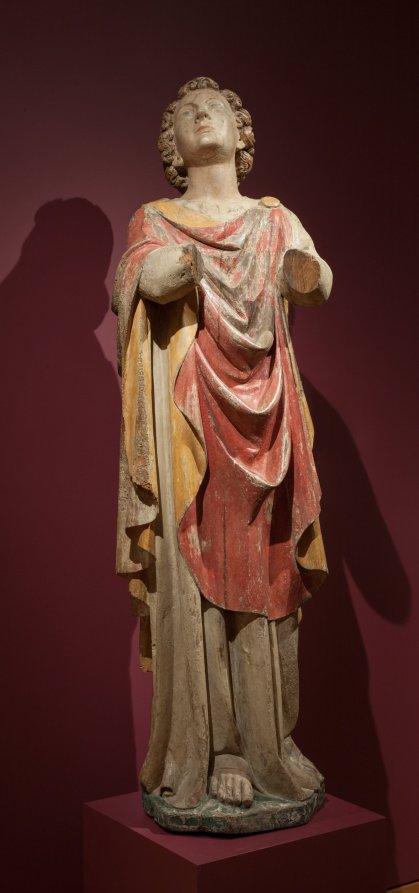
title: Saint John the Evangelist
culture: Italy, Tuscany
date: c. 1400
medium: polychromed walnut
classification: Sculpture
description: This sculpture was originally part of a life-sized Crucifixion group and intended to be seen with two more statues: a crucified Christ and a standing Virgin. Multifigured ensembles in wood belong to a vigorous tradition in central Italy extending from the 1200s to the 1400s. Most commonly, these groups represent the Deposition (Christ being lowered from the cross) or the Lamentation (Mary cradling the dead Christ on her lap). Crucifixion groups consisted of a central sculpture of Christ on the cross flanked on his right by the Virgin Mary and on his left by Saint John the Evangelist. Such groups were often displayed during Holy Week in Italy and Spain.